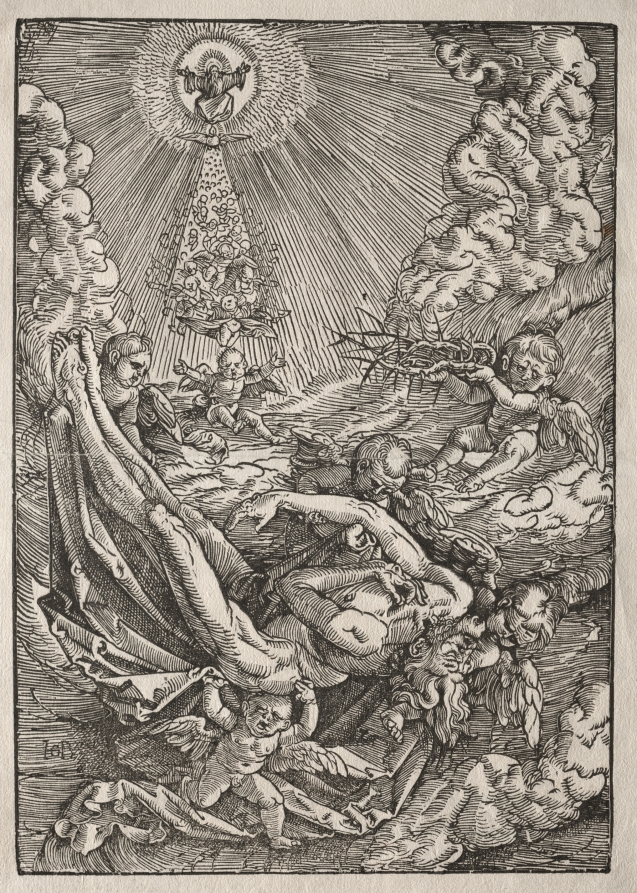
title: Christ Carried to Heaven by Angels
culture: Germany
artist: Hans Baldung (German, 1484/85–1545)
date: c. 1515–17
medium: woodcut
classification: Print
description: Baldung, who lived in Strasbourg, was Albrecht Dürer's most talented pupil. A highly original artist, he produced about 550 woodcuts. The origin of his nickname, Grien, to which the G in his monogram refers, is unclear. It may allude to his predilection for the color green, or it may derive from Grienhans, meaning devil (demonic fantasies appear in some of the artist's works). Baldung often avoided conventional compositions in favor of an innovative depiction of greater pathos and drama. Although a living Christ had long been shown ascending to heaven, Baldung's representation—in which Christ's corpse is carried heavenward by angels—is unprecedented. In contrast to the celestial splendor at the top of this composition, where God the Father and the dove of the Holy Spirit are illuminated by a burst of radiant light, Christ is shown in a harshly awkward position, accentuating his torment and suffering. The angels labor to carry the heavy body, which appears to be sinking downward, reminiscent of scenes of the entombment, in which Christ is lowered into a grave. This devotional image gives visual form to one of the central mysteries of the Christian faith, the contradiction between Christ's human suffering and his divine nature, symbolized by the grandeur of heaven.